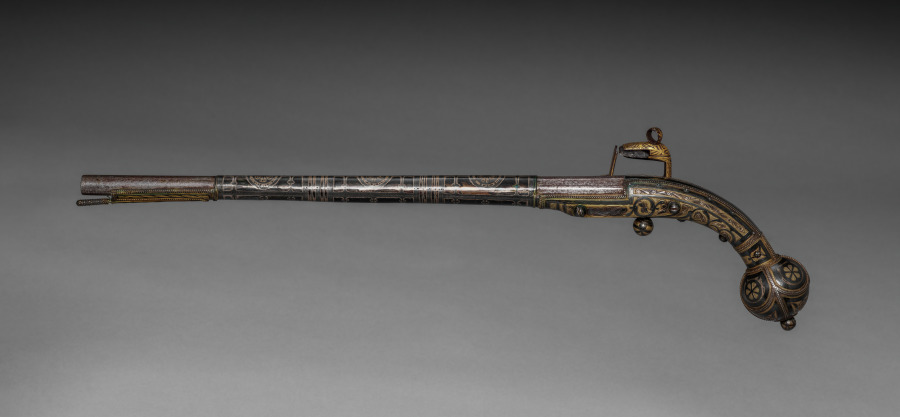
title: Ball-Butted Miquelet-Lock Pistol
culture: Caucasus, Daghestan, 19th century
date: c. 1850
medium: steel, brass, silver; gold inlay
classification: Arms and Armor